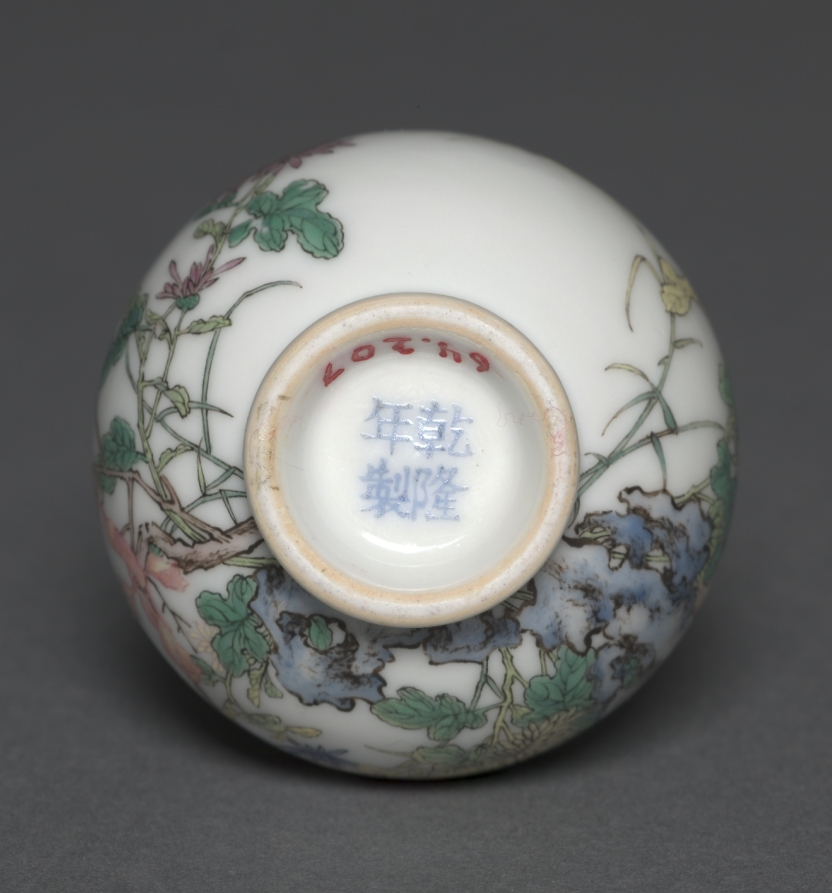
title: Miniature Vase with Birds and Chrysanthemums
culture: China, Jiangxi province, Jingdezhen kilns, Qing dynasty (1644-1911), Qianlong mark and reign (1736-95)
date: 1736–95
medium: porcelain with famille rose overglaze enamel decoration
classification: Ceramic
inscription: 乾隆年製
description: In the Qing dynasty (1644–1911), imperial patronage and a growing urban population encouraged consumption of luxury goods and local craftmanship. Luxury items became more affordable to larger parts of the society, including women, merchants, and literati in non-official positions. This miniature porcelain vase with famille rose overglaze enamel decoration illustrates some of the highest technical accomplishments in Qing porcelain production.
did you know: Famille rose overglaze enamel decoration is accompanied by underglaze blue on the vase's collar and handles.